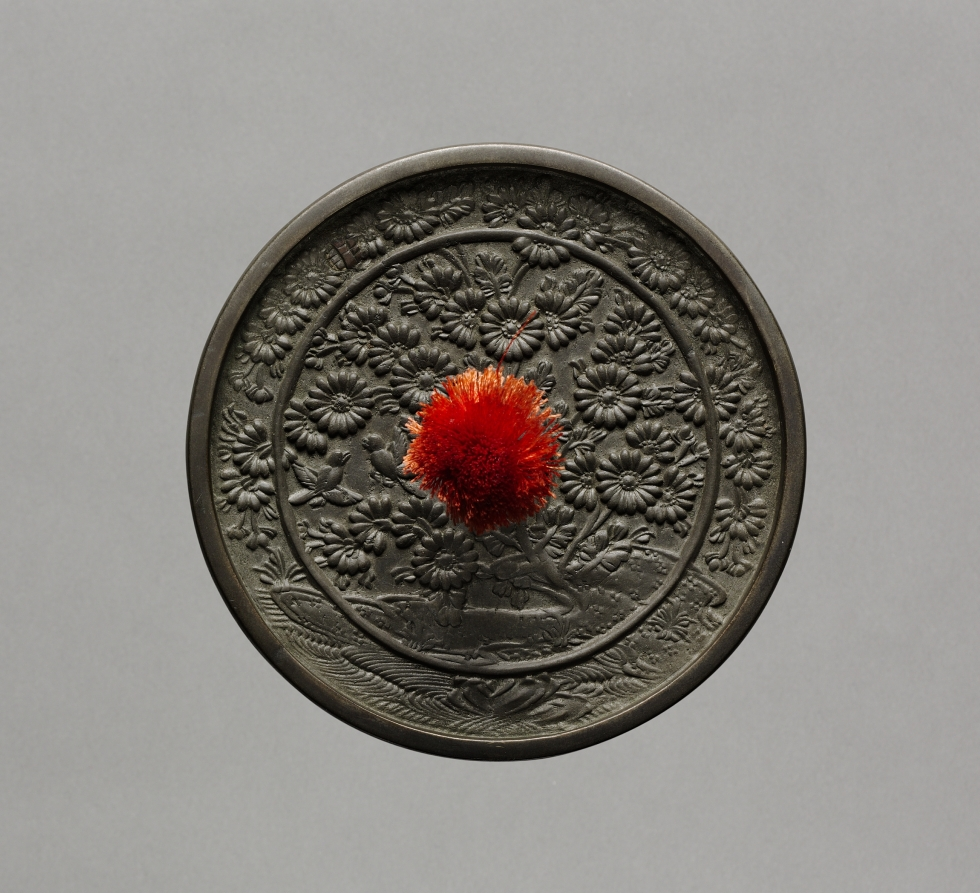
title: Mirror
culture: Japan, Kamakura period (1185–1333)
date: 1200s–1300s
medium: bronze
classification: Metalwork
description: The Japanese used chrysanthemums as decorative elements on mirrors. In the Heian period, a chrysanthemum with cranes or long-tailed birds was a common motif. Later, in the Kamakura and Muromachi periods, chrysanthemum designs were divided into three patterns with different symbolic associations: Chrysanthemum with Cranes represented longevity; Water Flowing suggested longevity as well as the Noh drama Kikujido, or Chrysanthemum Boy; and East Fence alluded to the poem "Drinking Wine" by Tao Yuanming (365–427 CE). Here, the mirror featuring Buddhist iconography (kyojo) and a chrysanthemum design on the back shows that the flower was also appreciated in the context of Buddhism in the Kamakura period.